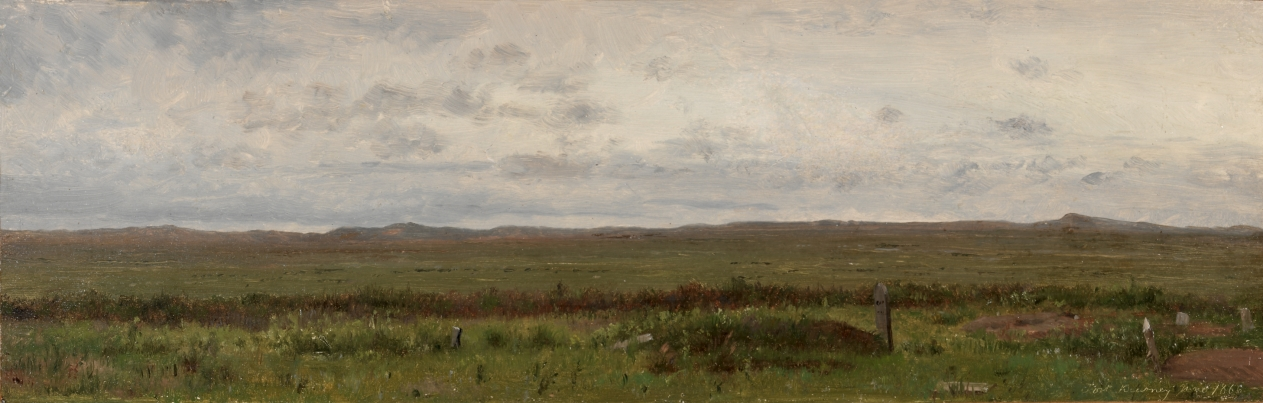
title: Graves of Travellers, Fort Kearny, Nebraska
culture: America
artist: Worthington Whittredge (American, 1820–1910)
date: 1866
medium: oil on paper mounted on canvas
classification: Painting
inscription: Inscribed lower right: "Fort Kearney June 1866"